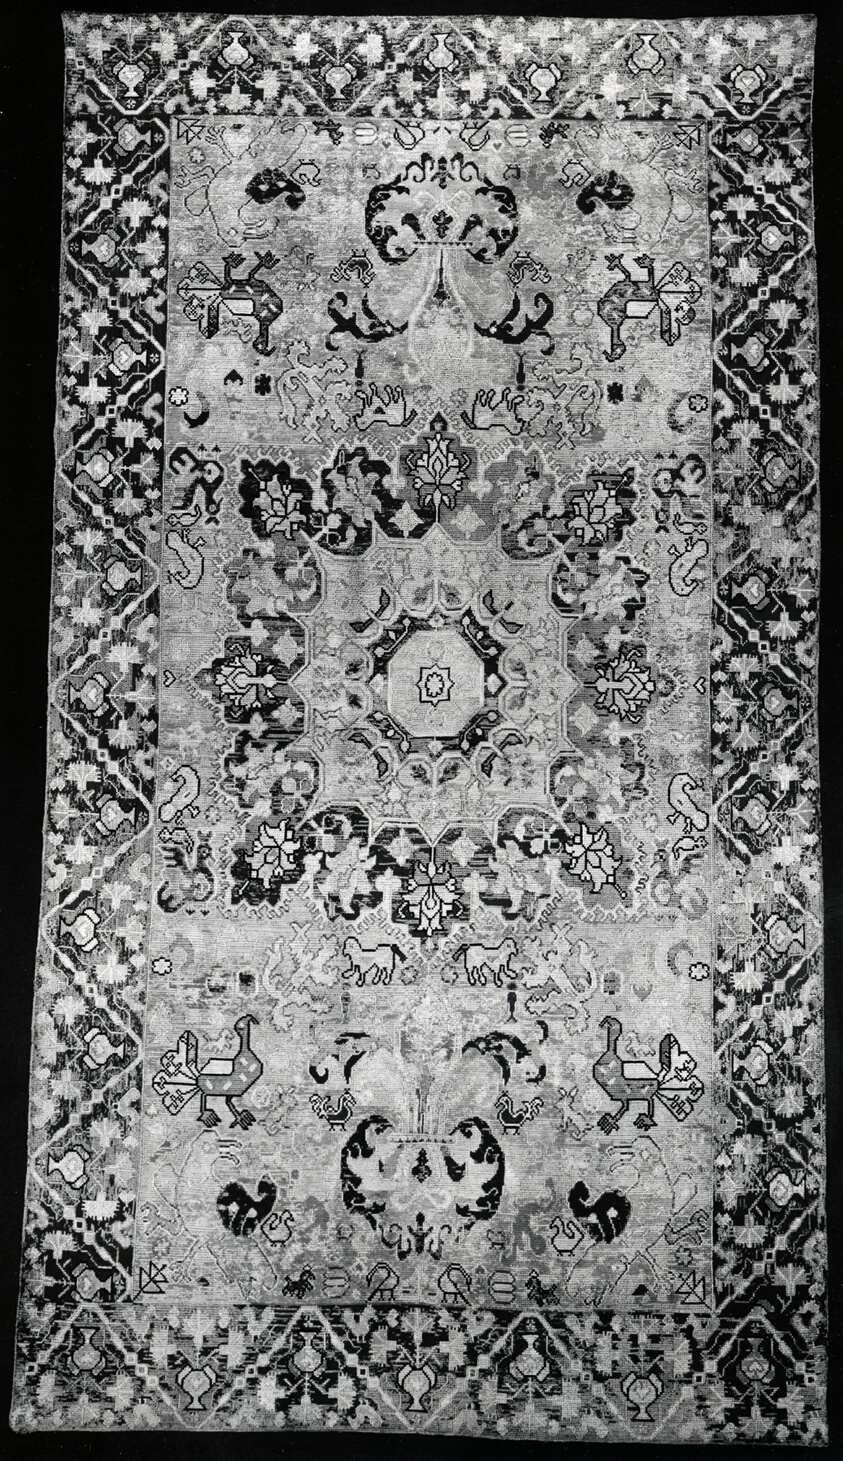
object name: Religious/Ritual Object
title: Altar Carpet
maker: Portugal, Arraiolas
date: 17th century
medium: Linen, plain weave; embroidered with wool in long-armed cross stitches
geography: Spain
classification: textile; needlework - carpet; ritual objects